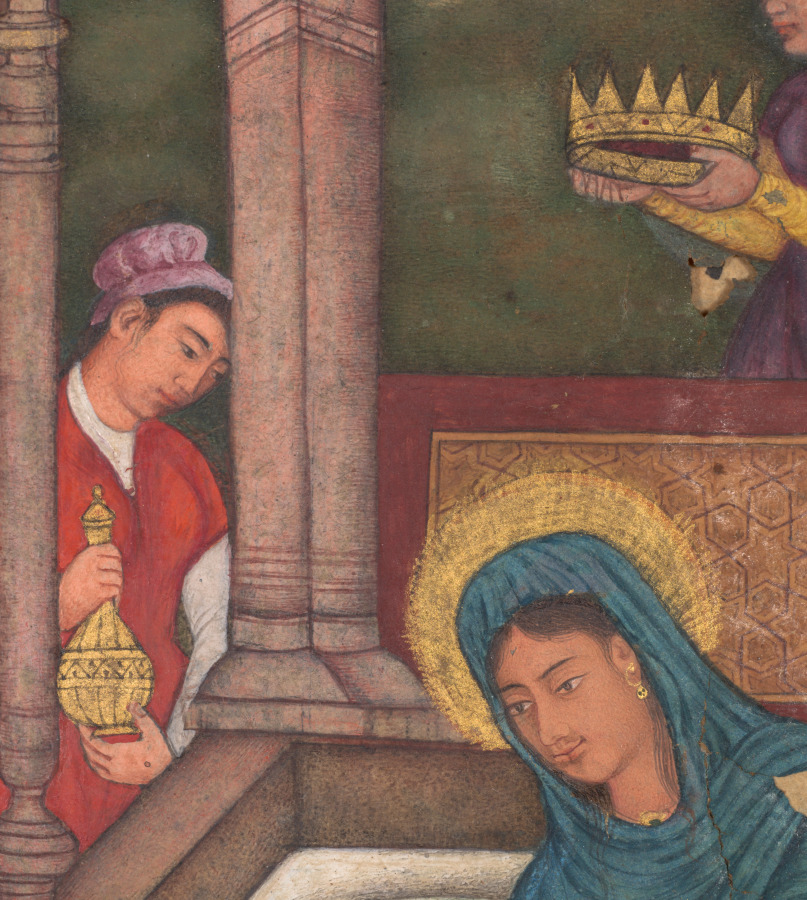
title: The Annunciation (folio 15 recto), from a Mirror of Holiness (Mir’at al-quds) of Father Jerome Xavier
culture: Mughal India, Allahabad, made for Prince Salim (1569–1627)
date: 1602–4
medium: Gum tempera, ink, and gold on paper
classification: Manuscript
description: Mary gazes down at the angel Gabriel as he kneels reverently, like a humble messenger, delivering the news that Mary will give birth to the son of God. His multicolored wings are forced within the boundary line of the painting field, visually implying a sense of subordination. Unlike many of the paintings in the Mirror of Holiness, the Annunciation is a familiar subject in European art, but the emphases vary. The Indian version depicts her as a queen, with a crown held above her head and attendants standing by.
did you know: The text states that Mary was only age 13 1/2 when the angel Gabriel came to her.